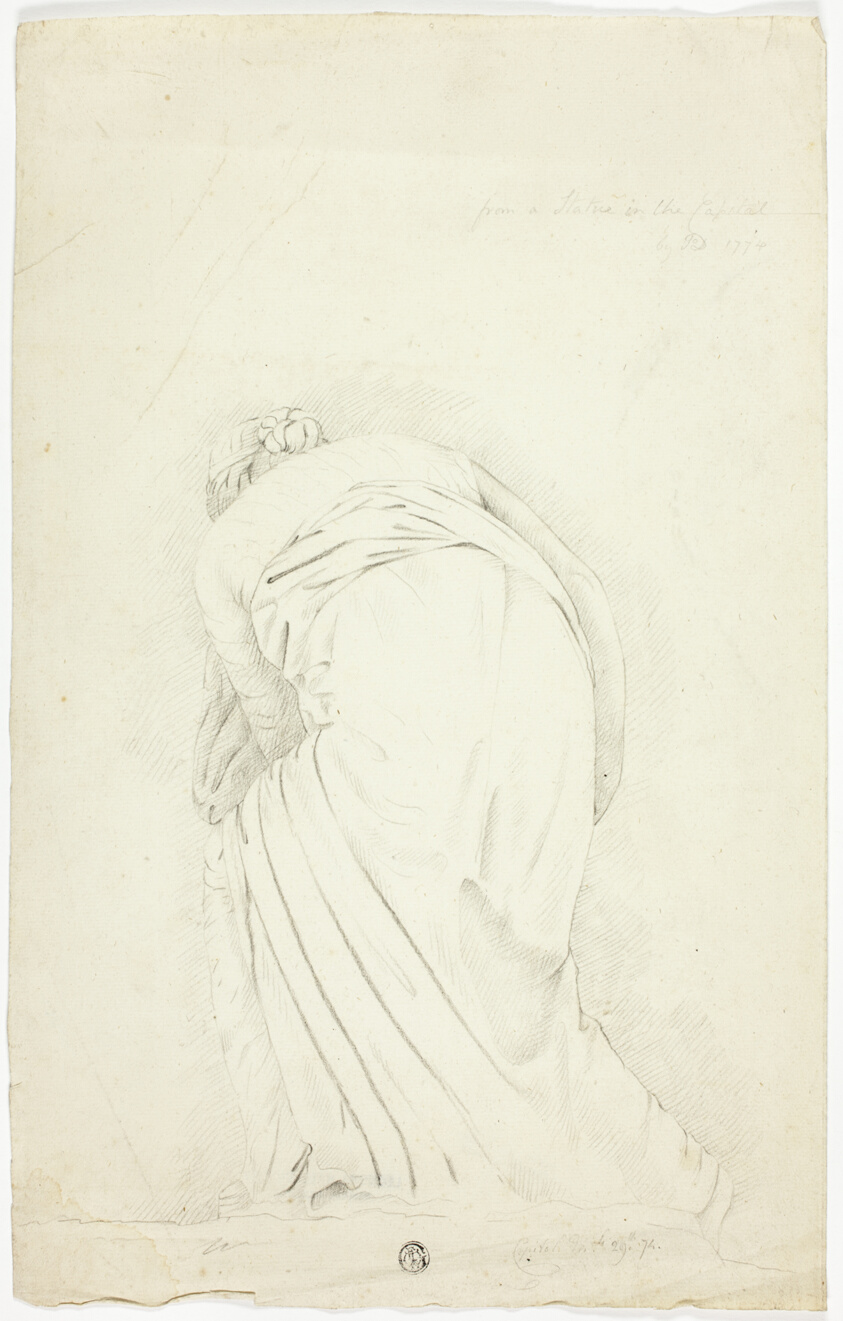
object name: Drawing and Watercolor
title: From a Statue in the Capitol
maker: John Downman (English, 1750-1824)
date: 1774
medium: Charcoal on ivory laid paper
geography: England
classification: charcoal; drawings (visual works); prints and drawing